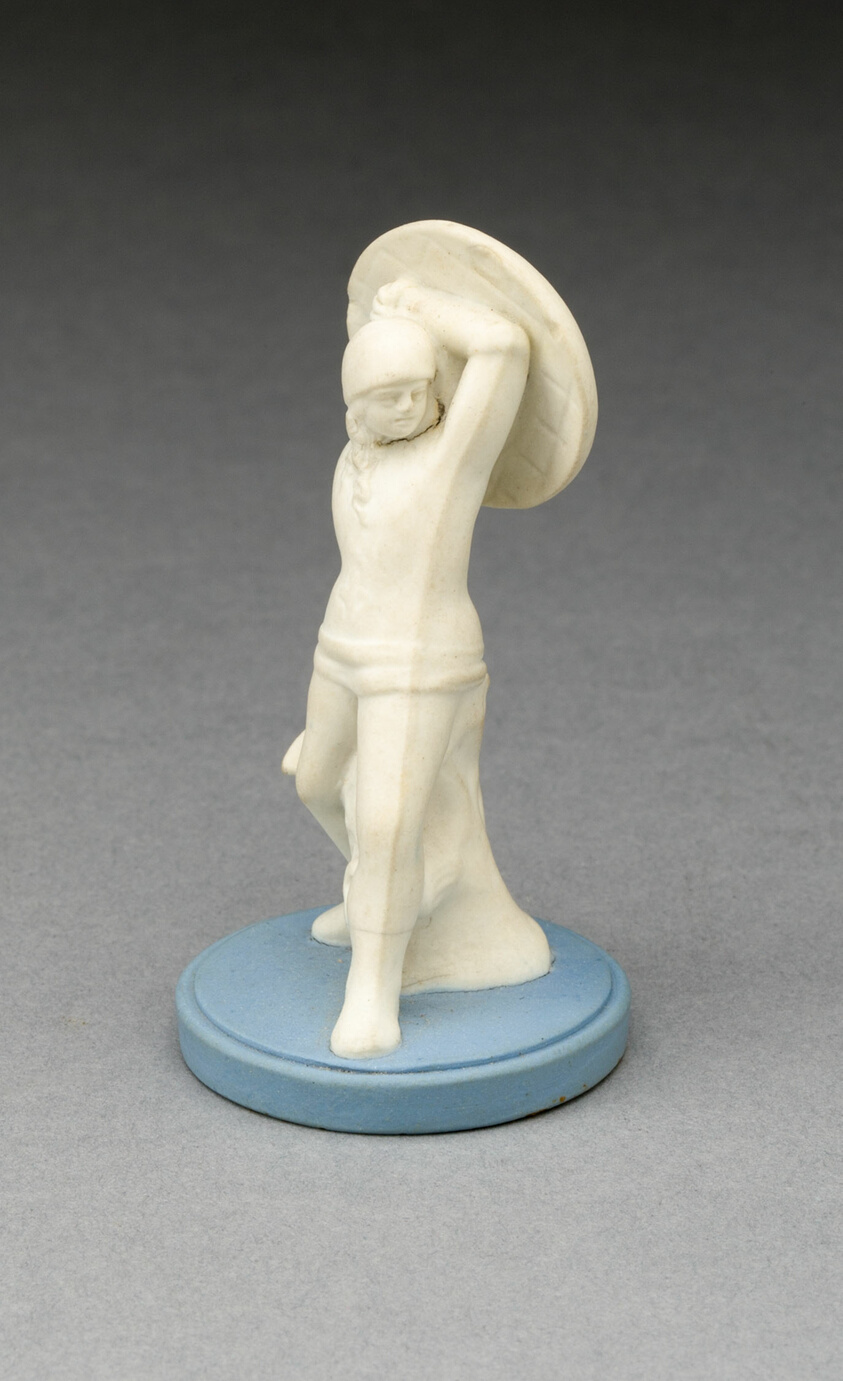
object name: Ceramics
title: Chess Piece: Pawn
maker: Wedgwood Manufactory (England, founded 1759)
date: 19th century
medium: Stoneware (jasperware)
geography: Burslem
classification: accessories (object genre); stoneware; european decorative arts; ceramics